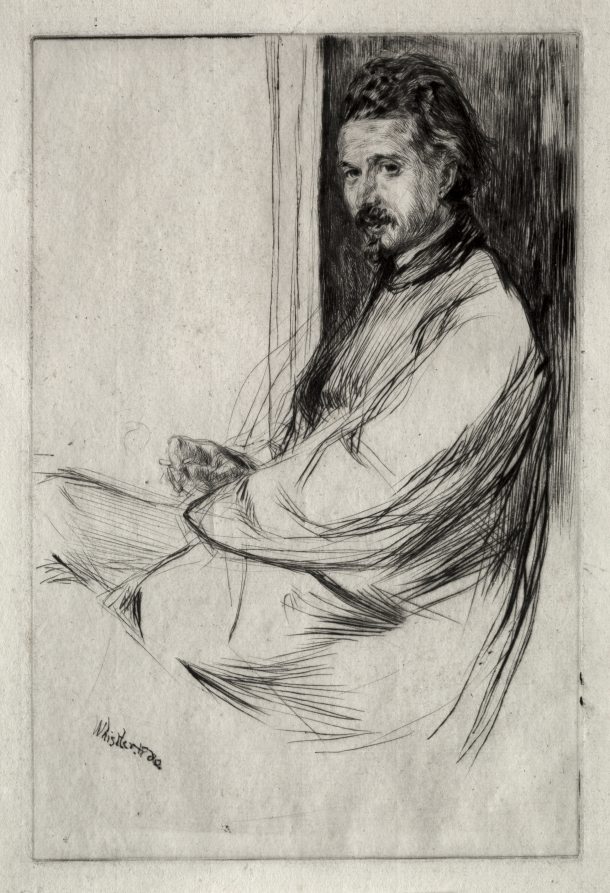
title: Axenfeld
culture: America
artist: James McNeill Whistler (American, 1834–1903)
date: 1860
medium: drypoint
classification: Print